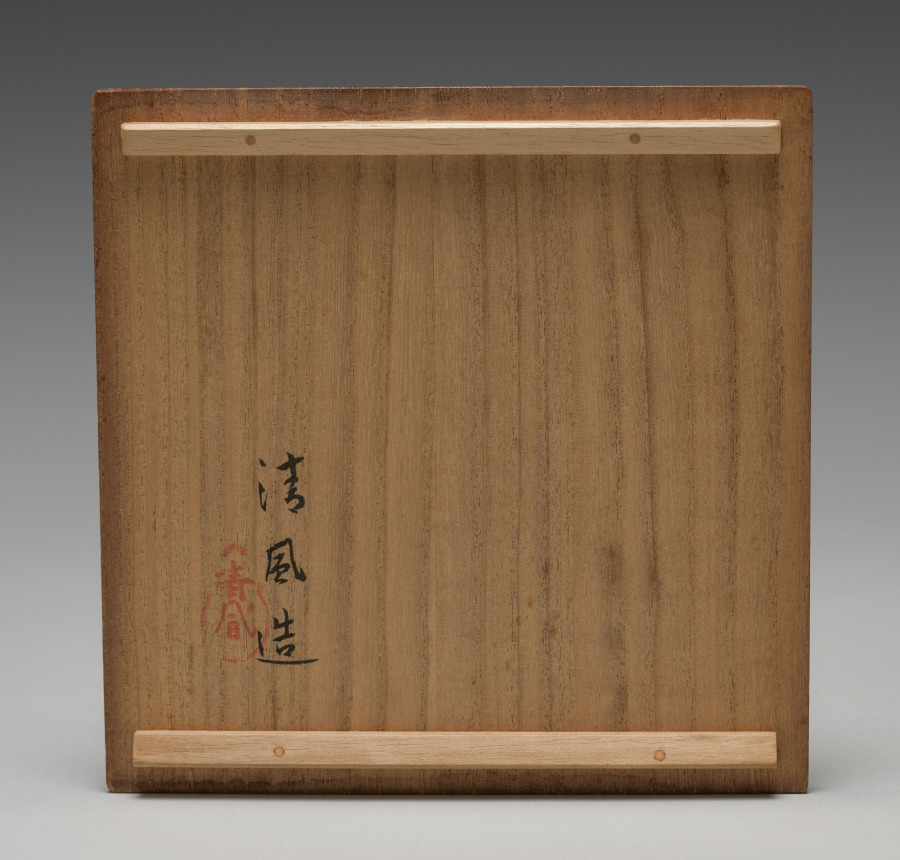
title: Water Container with Shell and Seaweed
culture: Japan, Meiji period (1868–1912) or Taishō period (1912–26)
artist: Seifū Yohei IV (Japanese, 1872–1951)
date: 1914–46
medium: Porcelain with underglaze blue, blue glaze and molded design and lacquered wood lid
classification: Ceramic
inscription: 清風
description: Yohei IV chose an aquatic theme for this mizusashi. He applied clay to the surface and molded the shape of a large conch on one side and, on the other, a clam and a scallop. The finer details he incised into the surface of his low-relief shapes. He then painted seaweed as though it were coming out from behind the sea creatures, and he further set off the animals using a masking technique with a gradated blue surround. Finally, he applied a translucent blue glaze, identified on the box as mizusai, over the entire body of the vessel. The resulting effect is that one imagines having descended through the water to the ocean floor.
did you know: A mizusashi, water container, is an essential utensil for a tea ceremony.